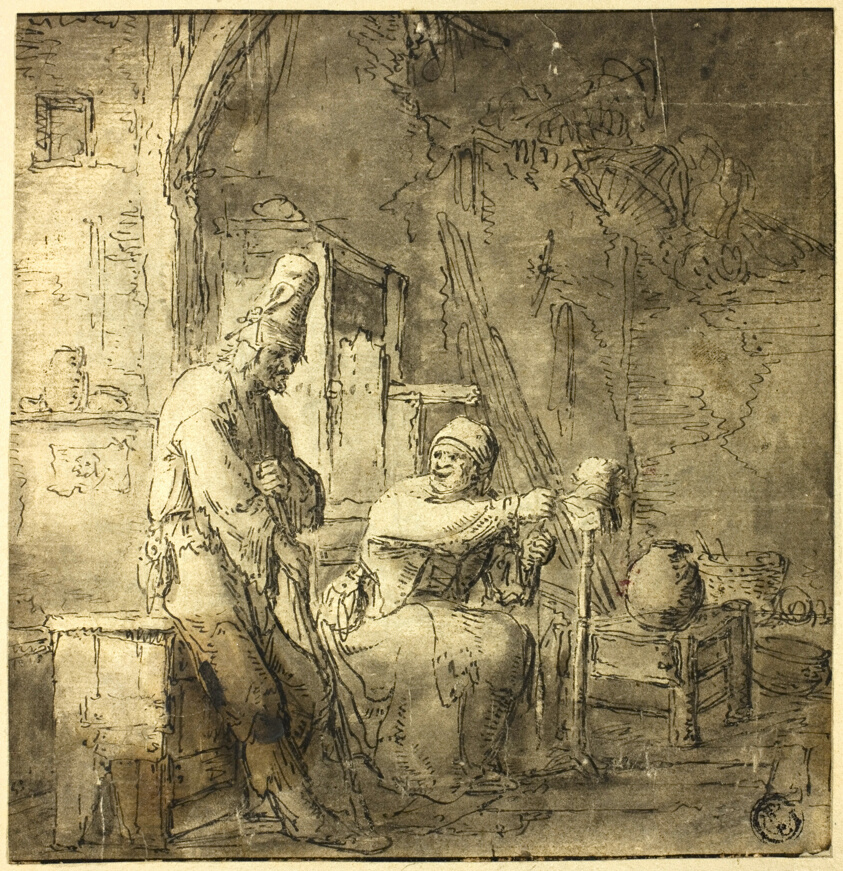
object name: Drawing and Watercolor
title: Old Peasant Couple in Cottage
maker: After Adriaen van Ostade (Dutch, 1610-1685); or possibly Bartholomeus Molenaer (Dutch, d. 1650); or possibly Cornelis Beelt (Dutch, flourished 1661-c.1702)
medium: Pen and brown ink, with brush and brown wash, on ivory laid paper, laid down on card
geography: Holland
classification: pen and ink drawings; drawings (visual works); prints and drawing